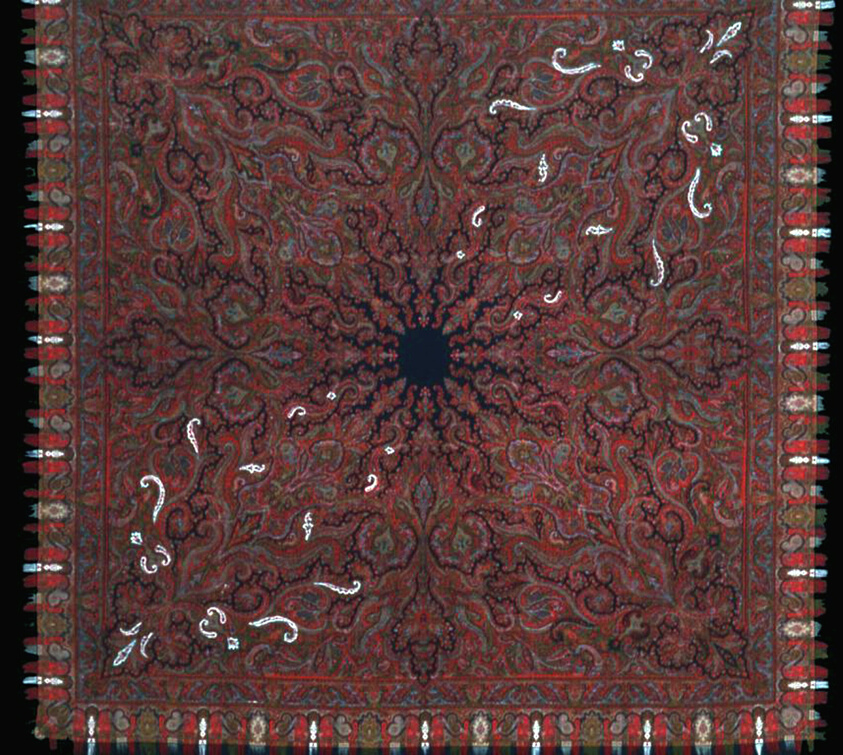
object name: Textile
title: Square Shawl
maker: Possibly France or Germany, Saxony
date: 1870s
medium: Wool and cotton, center of weft-float faced 1:2 'Z' twill weave; patterned areas of warp-float faced 5:1 'S' twill weave with supplementary inner warps and supplementary patterning wefts bound in warp-float faced 2:1 'S' twill and plain interlacings; "Harlequin" tabs of warp-float faced two-color complementary warp 5:1 twill weave with supplementary patterning wefts bound in warp-float faced 2:1 'S' twill interlacings; main warp fringe; woven on loom with Jacquard attachment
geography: France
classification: textile; weaving; costume accessory